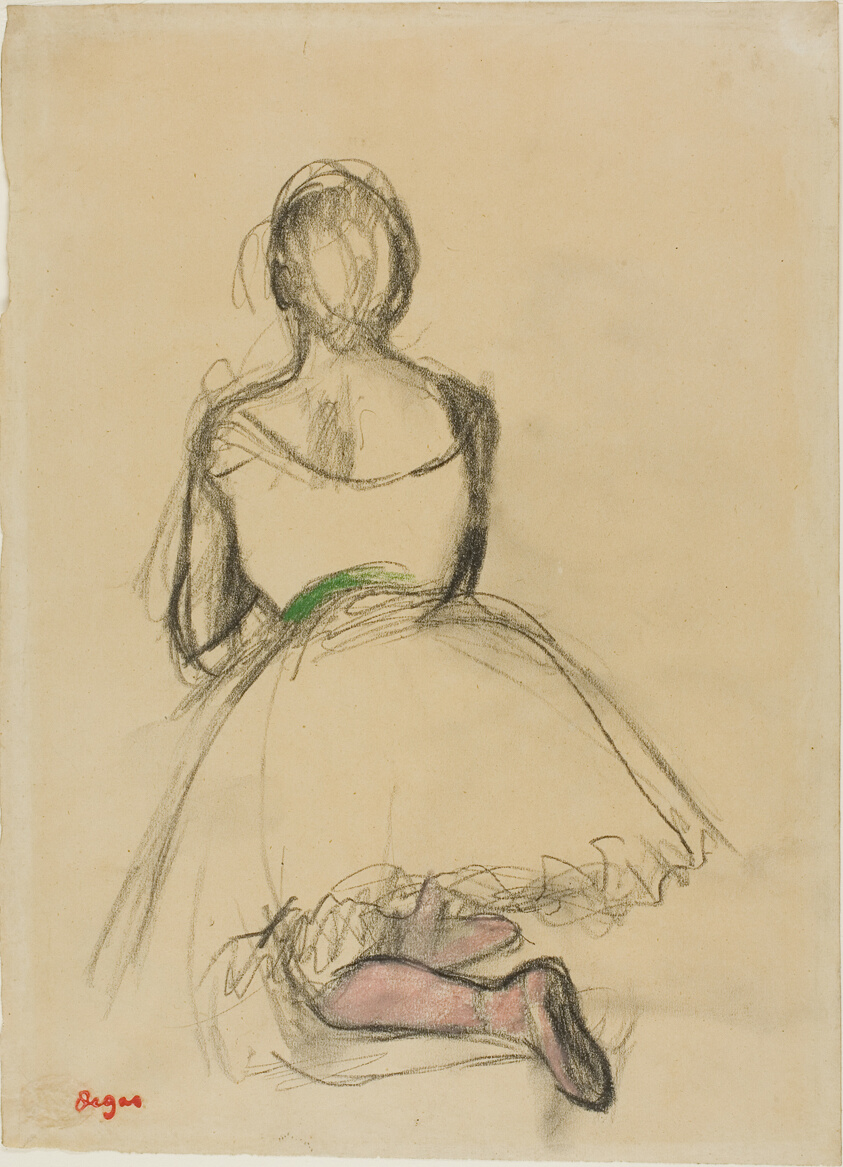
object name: Drawing and Watercolor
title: Dancer Kneeling, Seen from the Back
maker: Edgar Degas; French, 1834-1917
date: 1880/85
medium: Charcoal with pastel on cream wove paper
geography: France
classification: charcoal; drawings (visual works); prints and drawing; paper